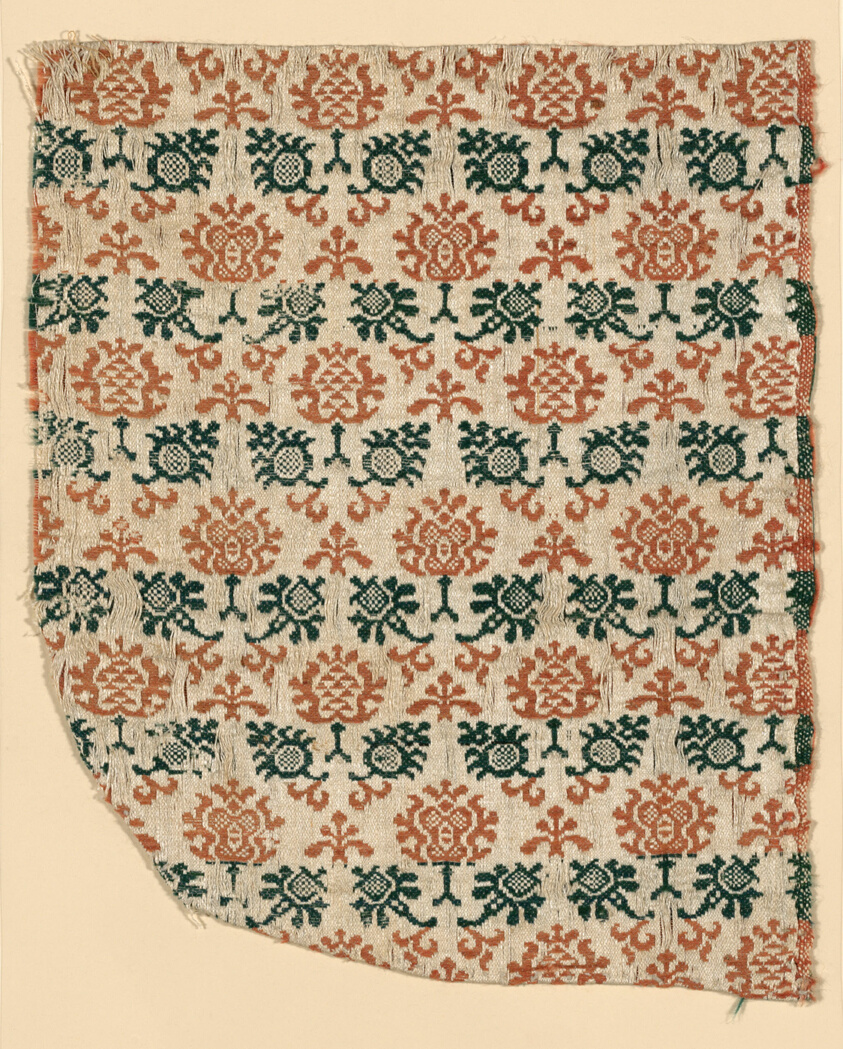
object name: Textile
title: Fragment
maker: Europe, possibly Italy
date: 17th century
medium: Linen and wool, compound weave (i.e. Beiderwand or Lampas 2:1)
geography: Europe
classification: textile; weaving